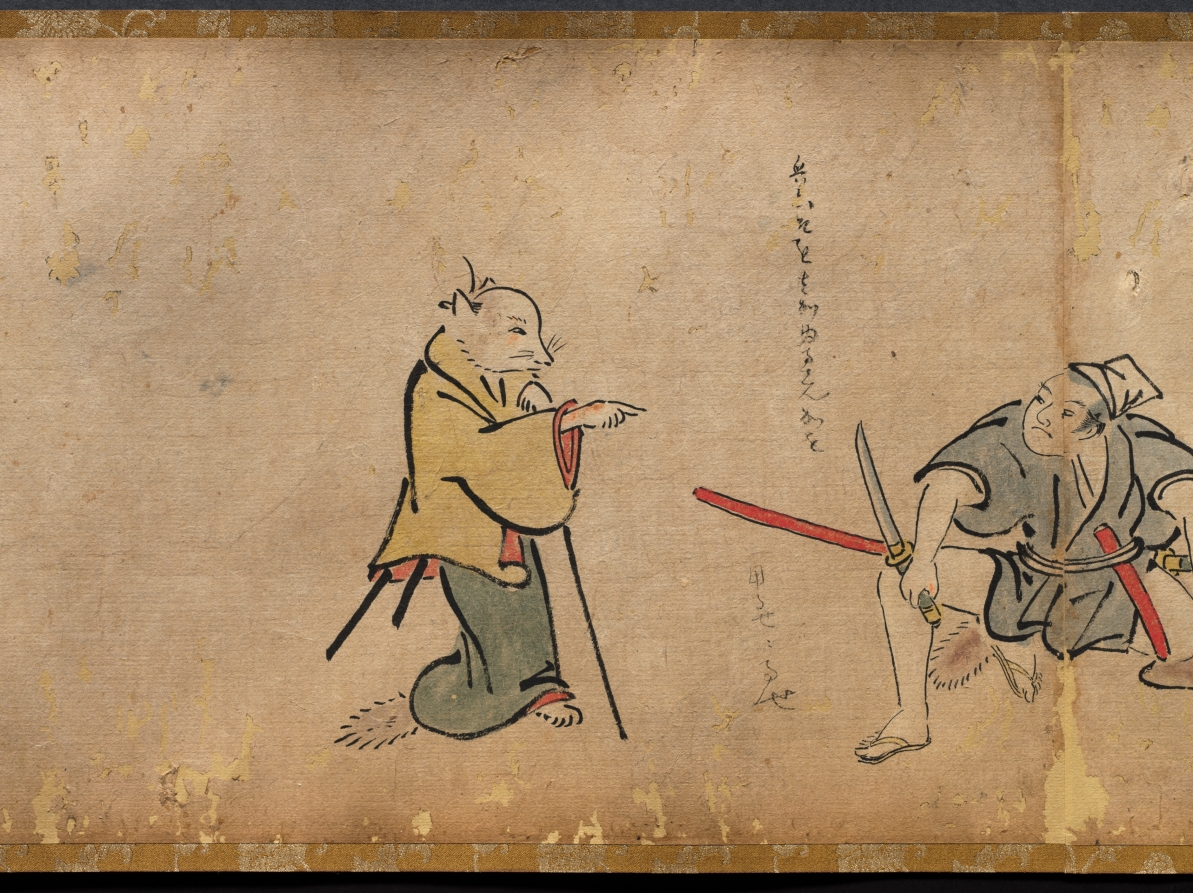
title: The Illustrated Tale of Oishi Hyōroku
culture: Japan, Edo period (1615–1868)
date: 1700s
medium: handscroll; ink and color on paper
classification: Painting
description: This incomplete handscroll illustrates part of the story of Oishi Hyoroku, a young man tasked with battling fox apparitions who were creating problems in his town. In other extant versions of the scroll, the story is set in the fall of 1624 in Kagoshima in southern Japan. Throughout the story, Hyoroku is tricked and terrified by the foxes that shift their shapes into a variety of monstrous phantoms. After repeated humiliations, he eventually captures two of the foxes. In this version, colloquial texts that function like text blurbs in comics appear throughout the scroll, but the main text is missing.